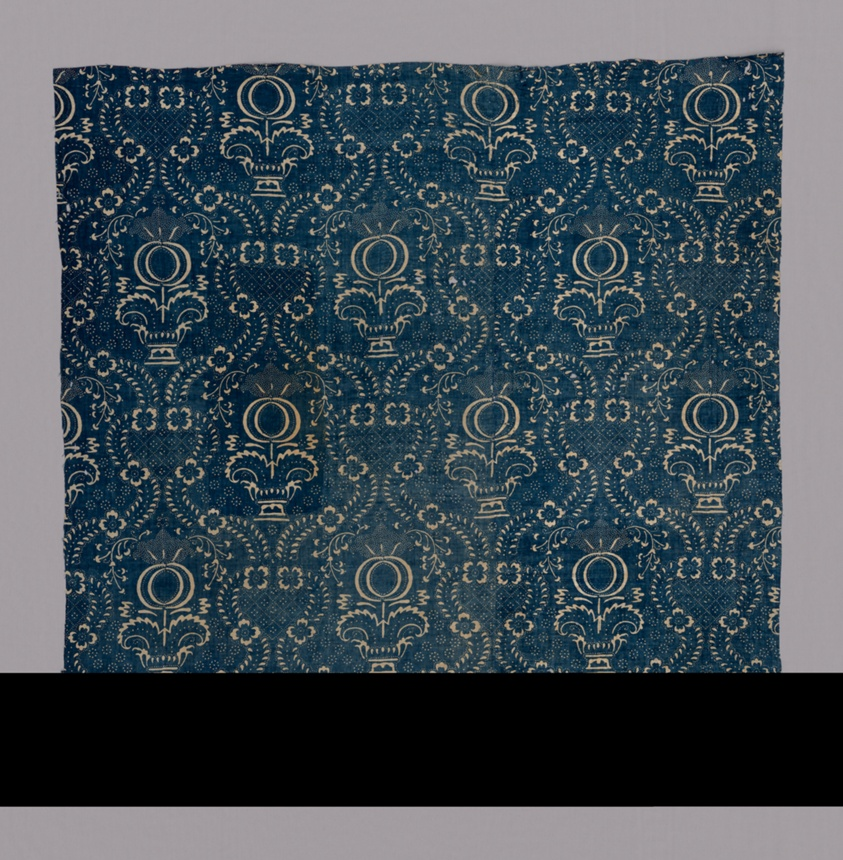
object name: Textile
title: Fragment (From a Quilt)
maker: Produced by Fauquet-Lemaître (French 1822-1936); France, Bolbec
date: 18th century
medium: possibly resist dyed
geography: France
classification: textile; weaving - printed